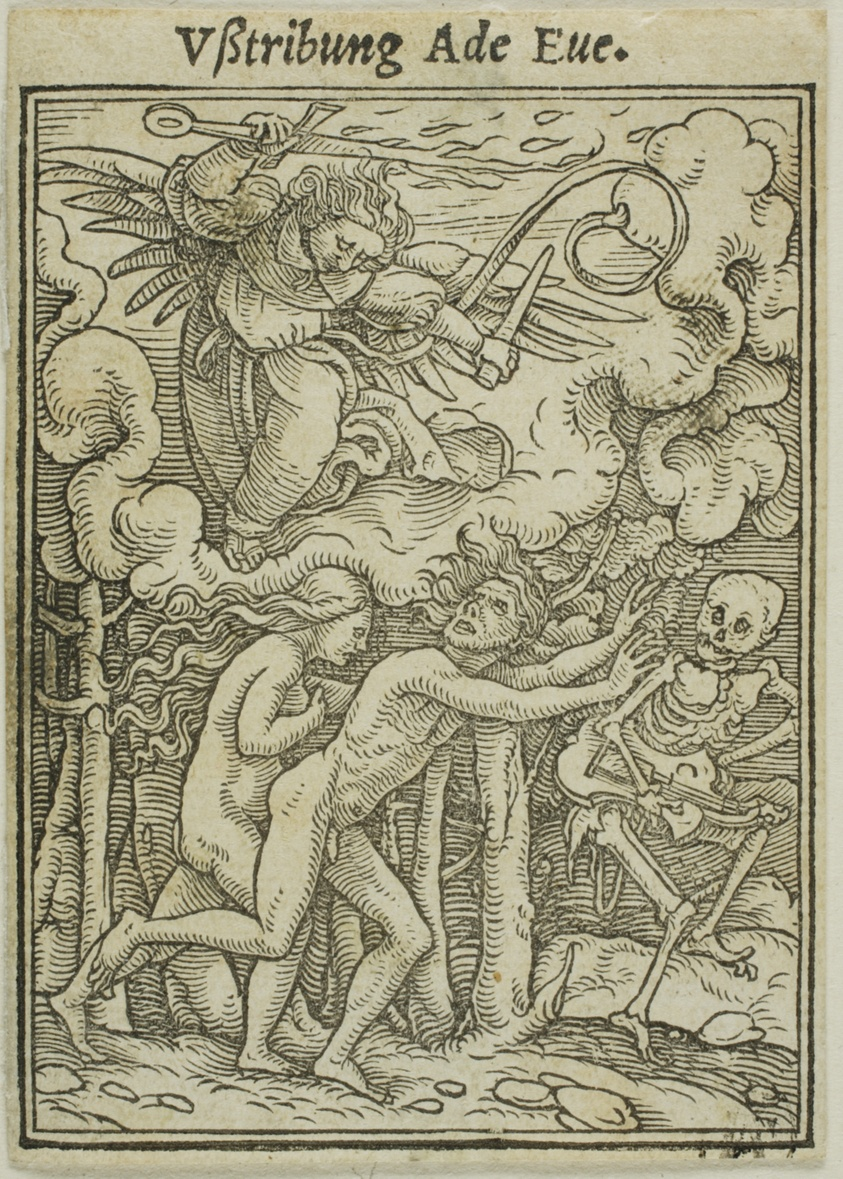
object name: Print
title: Adam and Eve Driven out of Paradise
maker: Hans Holbein, the younger (German, 1497-1543)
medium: Woodcut on paper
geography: Germany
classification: woodcut; print; prints and drawing